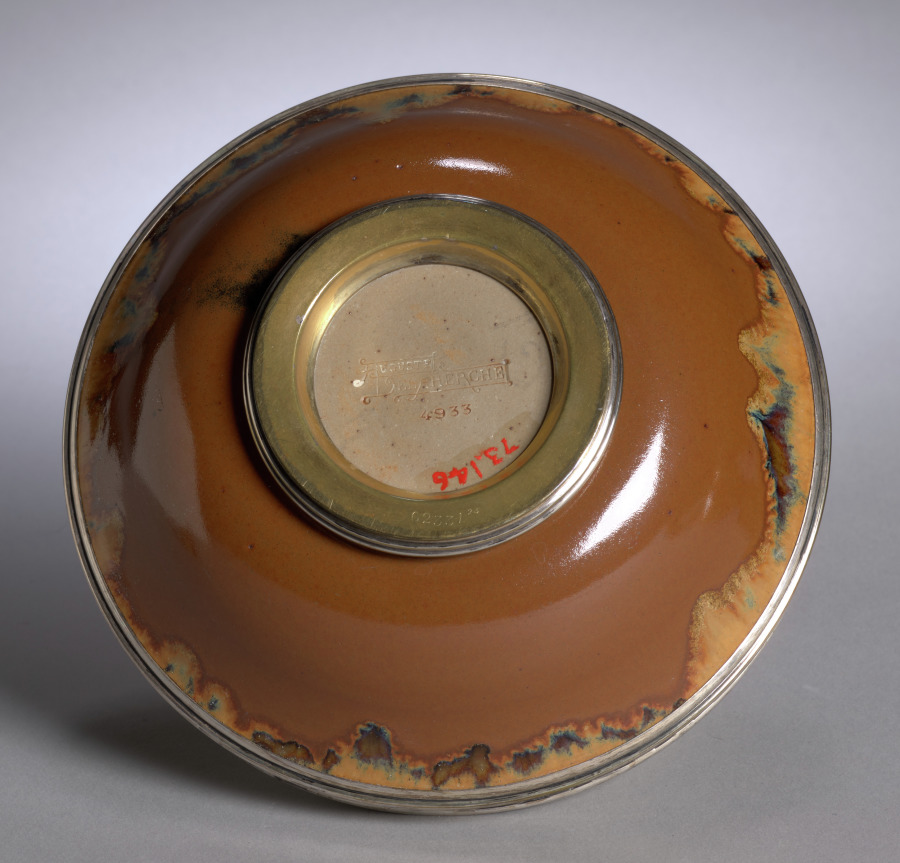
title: Bowl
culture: France, late 19th-early 20th Century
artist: Auguste Delaherche (French, 1857–1940)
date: c. 1899–1900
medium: stoneware with metal mounts, silvered and gilded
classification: Ceramic